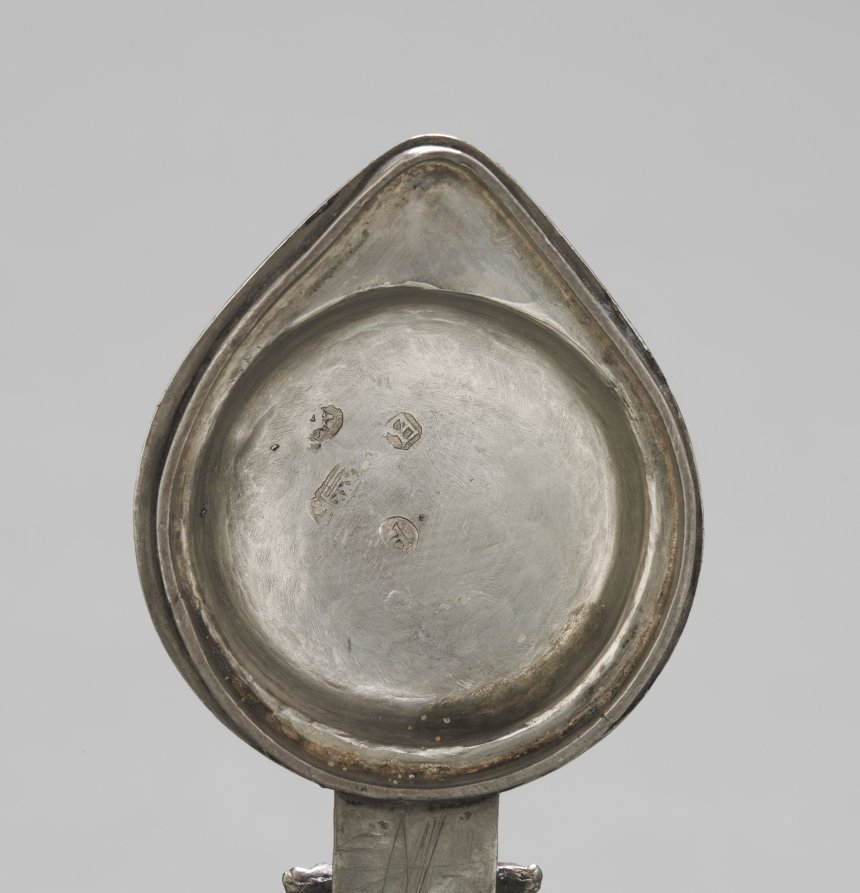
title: Jug with Silver Mounts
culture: Japan, Edo period (1615–1868)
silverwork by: Barent van Leeuwen (Dutch, 1637–1682)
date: c. 1662–76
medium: porcelain with underglaze blue decoration and silver mounts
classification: Ceramic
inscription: [on silver]: town mark for Amsterdam; lion rampant crowned (alloy mark for 0-934 silver); d (date letter for 1666), maker's mark of Barent van Leeuwen.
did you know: The coat of arms on this jug are those of the Valckenier family, active in the Dutch East India Company.